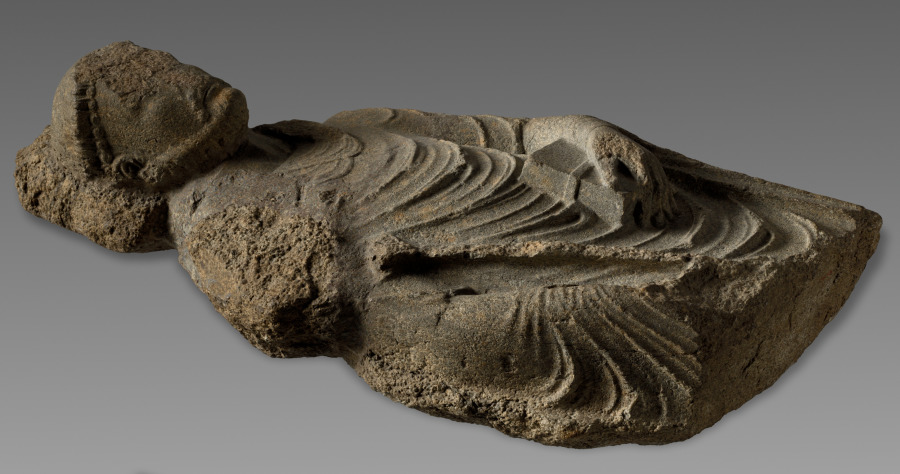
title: Effigy of an Abbot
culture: England, Dorset, 13th century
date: c. 1225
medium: Purbeck marble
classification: Sculpture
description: This funerary effigy represents one of the abbots of Cerne Abbey in Dorset, in southern England. His identity is unknown. Portrayed with tonsured (shaved) head and tightly curled beard, the abbot clasps a book in his left hand and traces of his crozier (staff) may be seen in his right hand—symbols of his office and pastoral authority. The figure is carved from "Purbeck marble," a limestone unique to the Purbeck Hills of Dorset. Very little remains of Cerne Abbey today, but it is known to have existed as early as the 9th century. The abbey was dissolved in 1539 by King Henry VIII during the English Reformation, at which time its buildings were razed to the ground. This is the only work of art that survives from the abbey and, though buffeted by time and history, retains much of its fine sculptural character. The sculpture has the additional distinction of being the only monument of its type in an American museum.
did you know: Researchers have been trying to identify which abbot is depicted here but so far have had no luck.